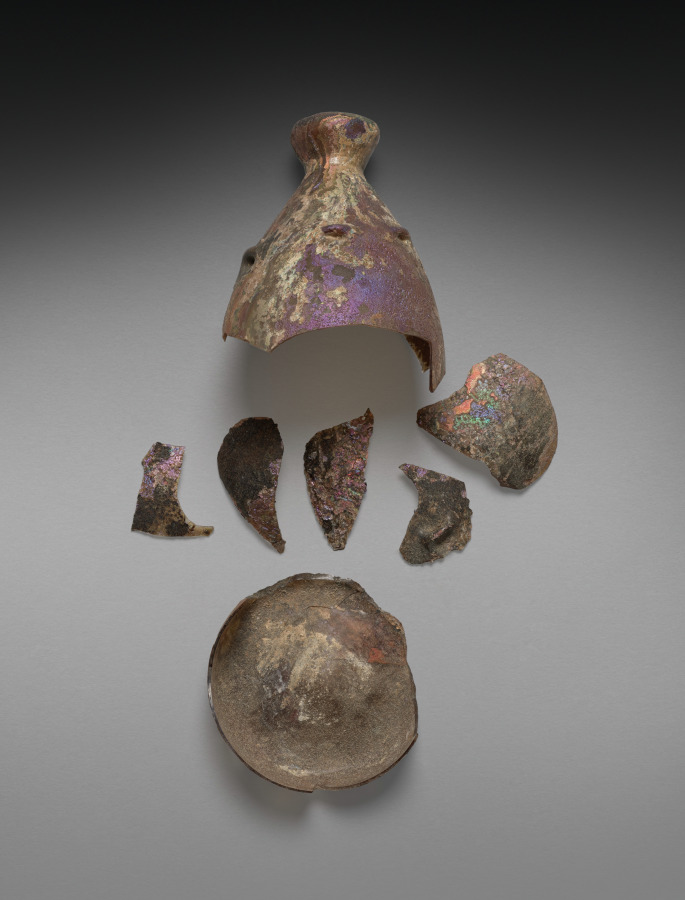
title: Bottle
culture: Syria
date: 900s–1100s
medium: glass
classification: Glass